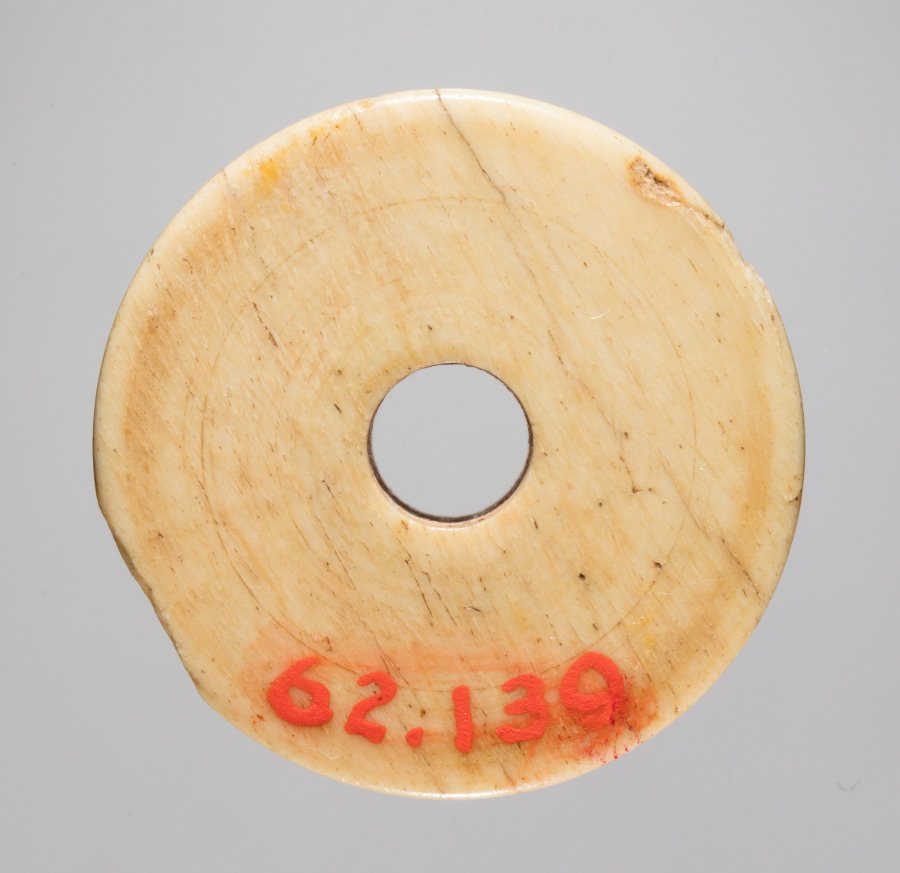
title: Spindle Whorl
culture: Iran, early Islamic period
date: 700s - 900s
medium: bone, incised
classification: Spindle Whorl